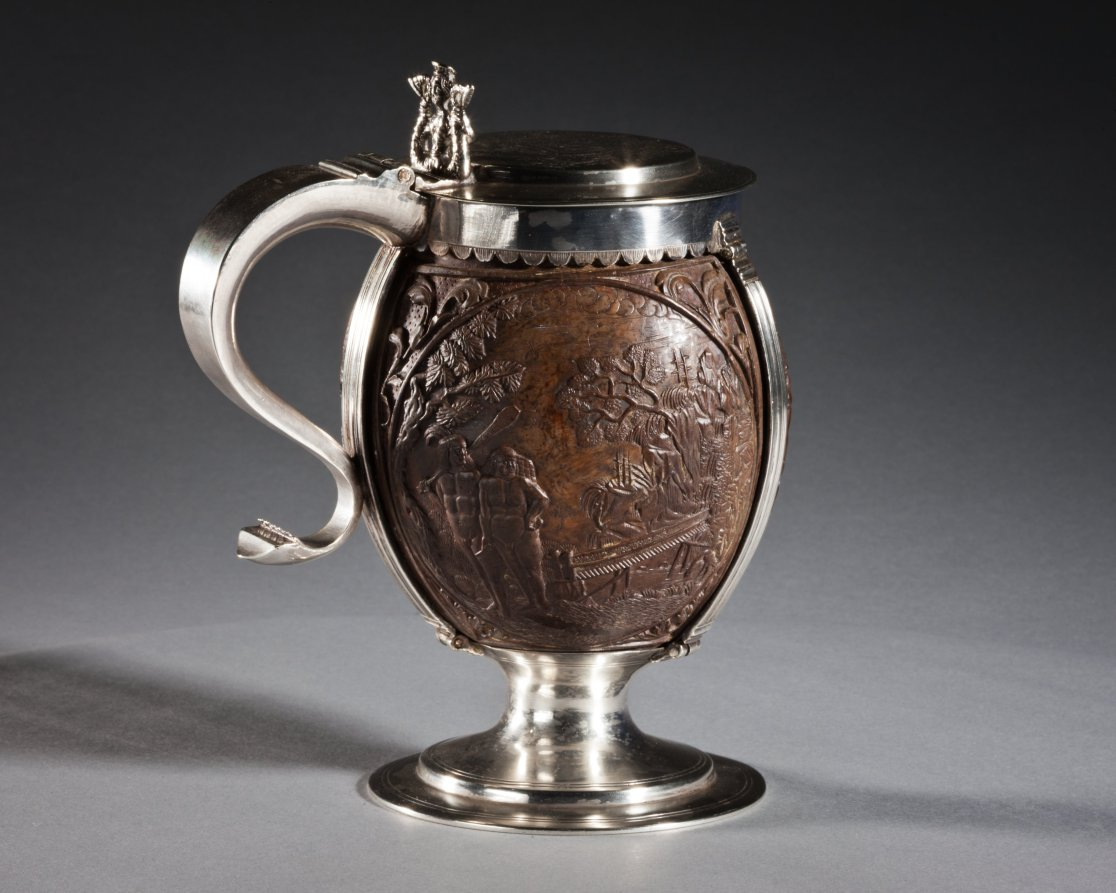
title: Coconut Cup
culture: carved coconut, probably The Netherlands; silver mount, probably England, 17th century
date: c. 1630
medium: carved coconut in silver mount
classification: Metalwork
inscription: top lid has engraved coat-of-arms, underside of lid has inscription: George Lewis TIVERTON Feby, 1st 1760.